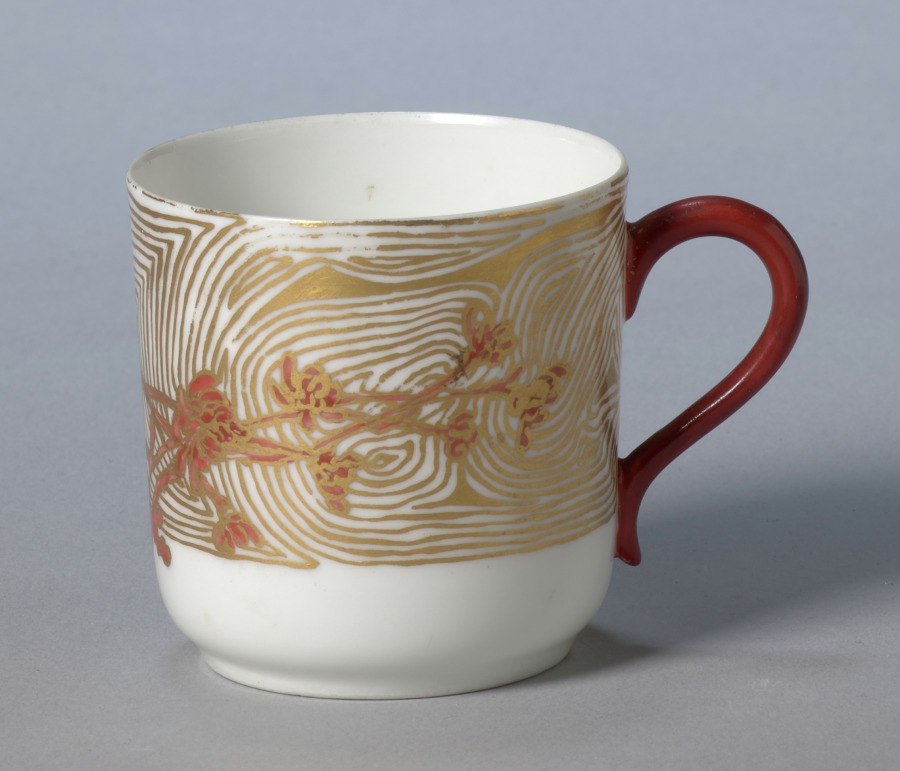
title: Cup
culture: America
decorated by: M. Louise McLaughlin (American, 1847–1939)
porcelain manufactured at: Haviland & Co. (French)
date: 1888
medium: porcelain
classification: Ceramic